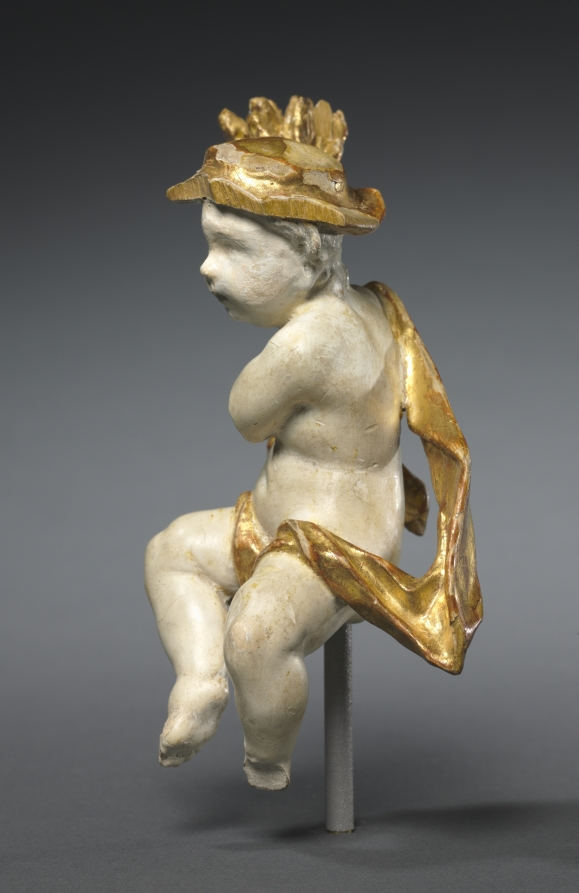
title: Putto as Summer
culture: Germany, 18th century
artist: Ferdinand Tietz (Austrian, 1708–1777)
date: c. 1765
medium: painted and gilded wood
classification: Sculpture